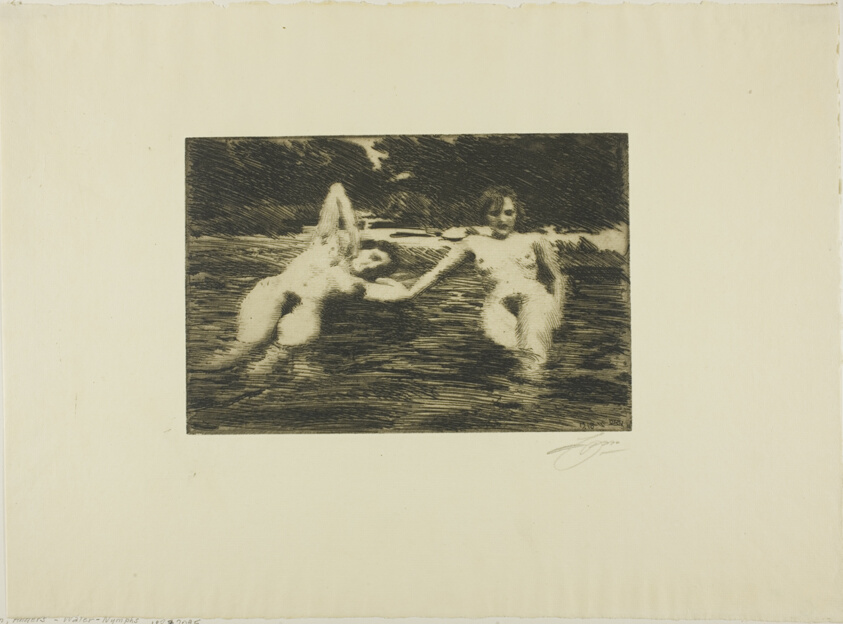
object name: Print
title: Water-Nymphs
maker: Anders Zorn (Swedish, 1860-1920)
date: 1918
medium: Etching on cream laid paper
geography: Sweden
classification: etching; print; prints and drawing